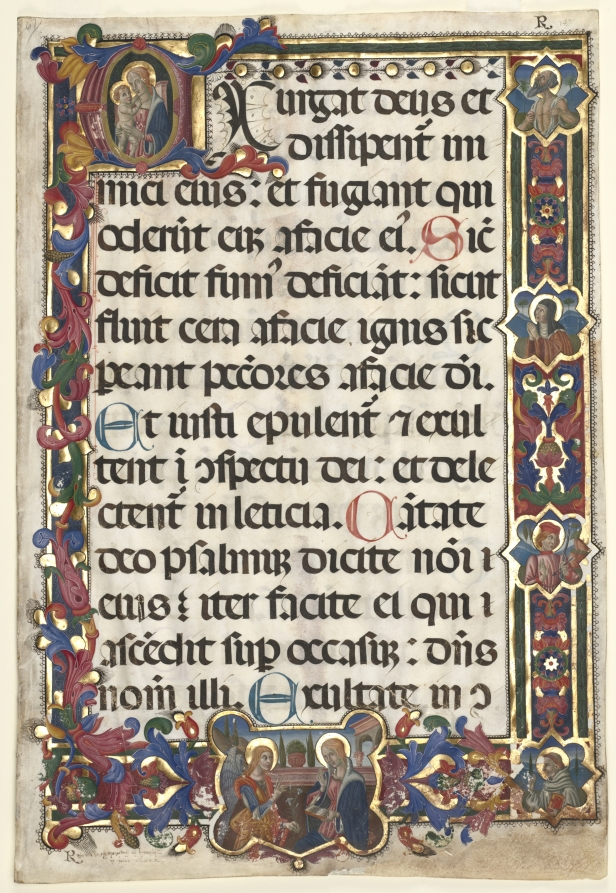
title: Leaf from a Psalter with Full Border with Medallions (Annunciation, SS. Jerome, Clare, Sebastian and Bernardino) and Historiated Initial (E): Virgin and Child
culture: Italy, Umbria or Tuscany, 15th century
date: 1475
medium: ink, tempera, and gold on parchment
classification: Manuscript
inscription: (Front:) Exurgat Deus, et dissipentur inimici ejus Sicut deficit fumus deficiant sicut fluit cera a facie ignis sic pereant peccatores a facie Dei Et iusti epulentur exultent in conspectu Dei delectentur in Laetitia Cantate Deo psalmum dicite nomini eius iter facite ei qui ascendit super occasum Dominus nomen illi et exultate in conspectu (Back:) eius turbabuntur a facie eius Patris orfanorum et iudicis viduarum Deus in loco sancto suo Deus inhabitare facit unius moris in domo qui educit vinctos in fortitudine similiter eos qui exasperant qui habitant in sepulchris Deus cum egredereris in conspectu populi tui cum pertransieris in deserto Terra mota est etenim caeli distillaverunt a facie Dei Sinai a facie Dei Israel Pluviam voluntariam segregabis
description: This leaf contains Psalm 67. The original full manuscript would have held all 150 psalms. Psalters like this were made in a large format for communal prayer. This leaf is richly adorned with an elaborate border with a historiated, or decorated, initial E showing the Madonna and Child. Around the border are Saint Jerome, Saint Clair, Saint Sebastian, and Saint Bernardino, a popular and much-venerated preacher from Siena, Italy. The bottom medallion depicts the Annunciation, or announcement to the Virgin Mary that she would conceive a son by the power of the Holy Spirit. She is shown seated, reading from a book of hours.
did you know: Saint Bernardino, seen in the lower right, was a popular and much-venerated preacher from Siena.